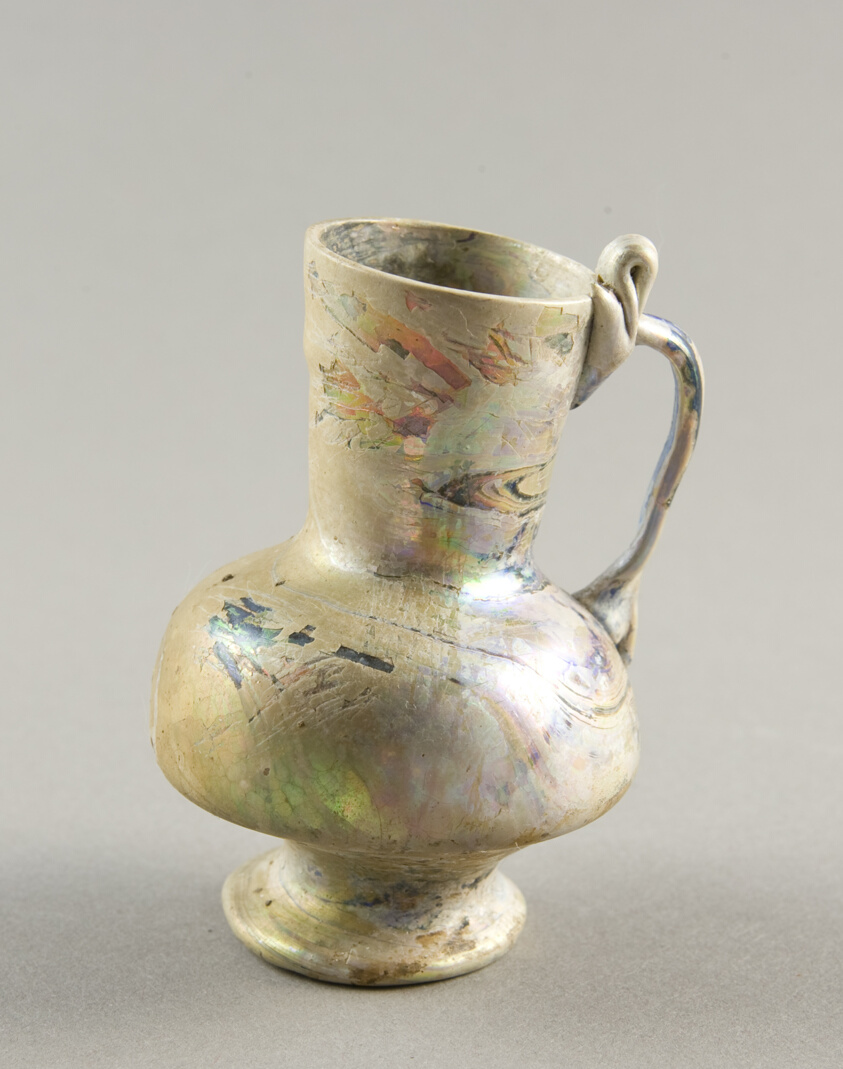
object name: Vessel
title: Jug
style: syrian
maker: Islamic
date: 9th-12th century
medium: Glass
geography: Syria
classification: glass; vessel; ancient art